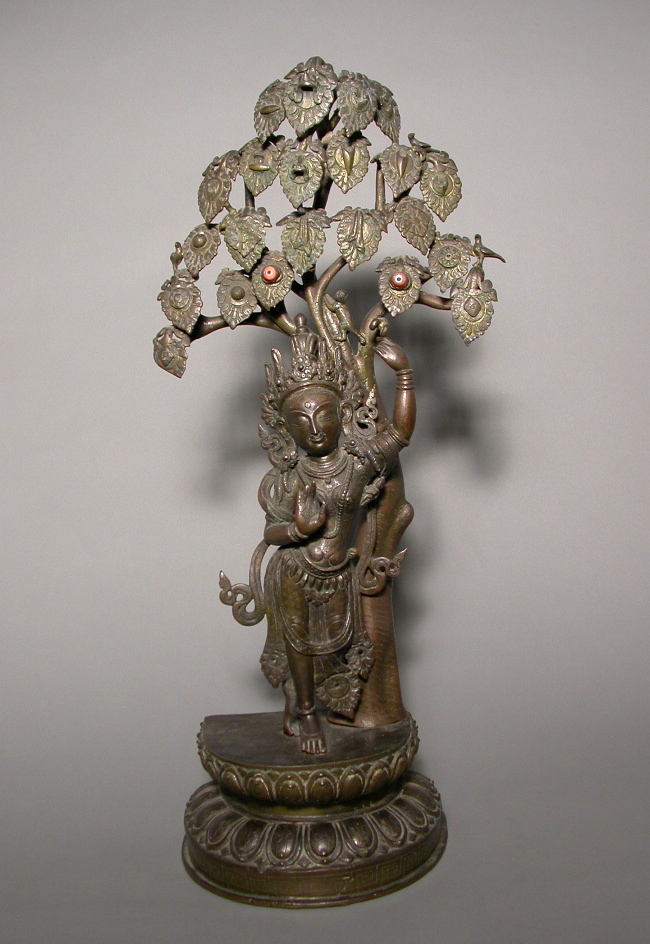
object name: Sculpture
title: Mayadevi, Mother of the Buddha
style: Himalayan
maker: Nepal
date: 19th century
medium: Bronze with coral inlay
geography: Nepal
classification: bronze; metal; sculpture; asian art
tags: mothers, parents